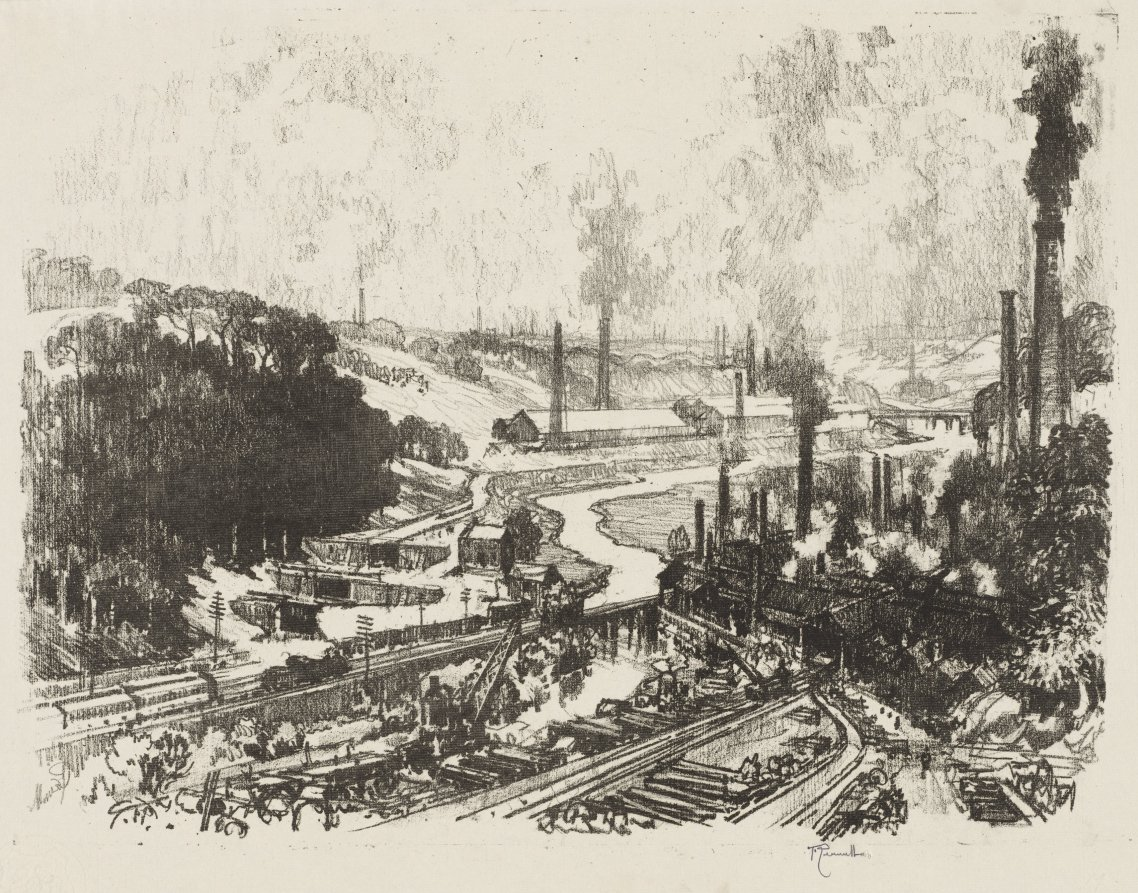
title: English War Work: Munition Works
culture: America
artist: Joseph Pennell (American, 1857–1926)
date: 1916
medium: lithograph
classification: Print